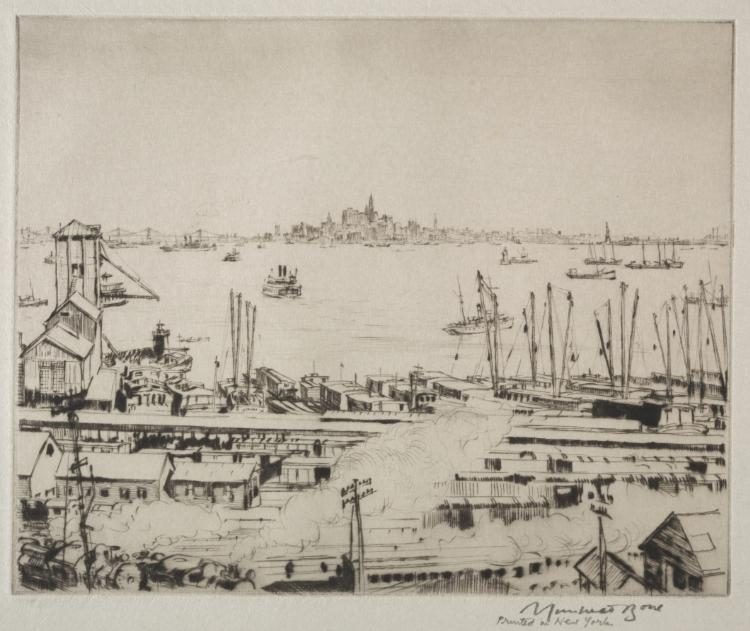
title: Manhattan from Staten Island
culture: England, 20th century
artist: Muirhead Bone (British, 1876–1953)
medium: drypoint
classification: Print